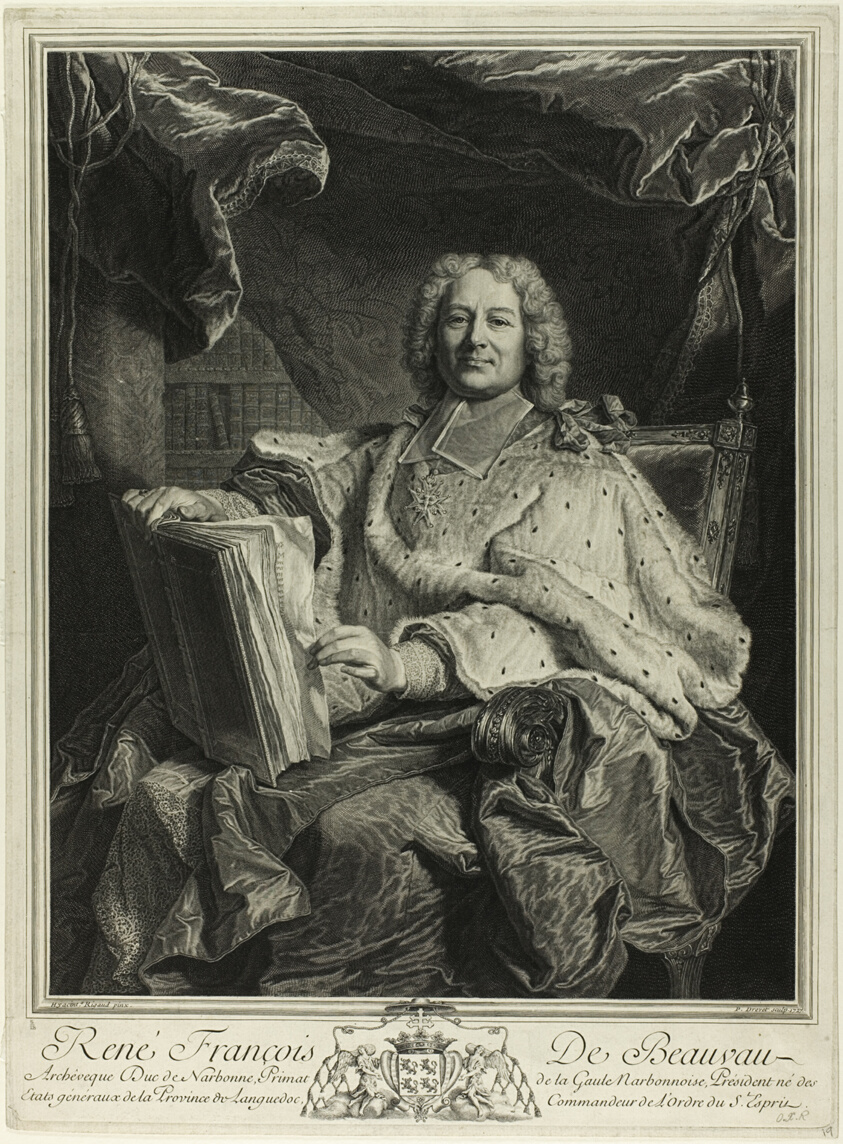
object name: Print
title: Portrait of René François de Beauveau du Rivau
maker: Pierre Drevet (French, 1663-1738) and Pierre-Imbert Drevet (French, 1697-1739); after Hyacinthe Rigaud (French, 1659-1743)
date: 1727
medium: Engraving on ivory laid paper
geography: France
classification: engraving; print; prints and drawing